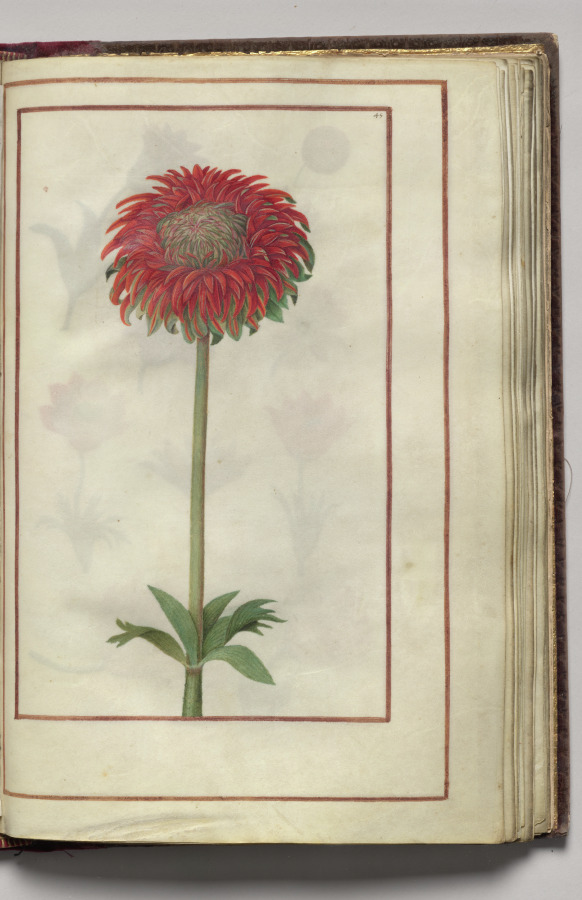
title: Dahlia?, folio 23 (recto), from Florilegium (A Book of Flower Studies)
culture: France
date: 1608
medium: watercolor, ink, silver, and gold over occasional traces of pencil, on vellum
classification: Bound Volume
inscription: Dated: Poitiers 1608 (on frontispiece) Signed: On frontispiece in black ink, lower right: Van Kuyk Notation on drawing: Frontispiece: in pencil, lower margin: * élève de Van Kessel, peintre flammand (* in pencil also appears in front of Van Kuyk's name).